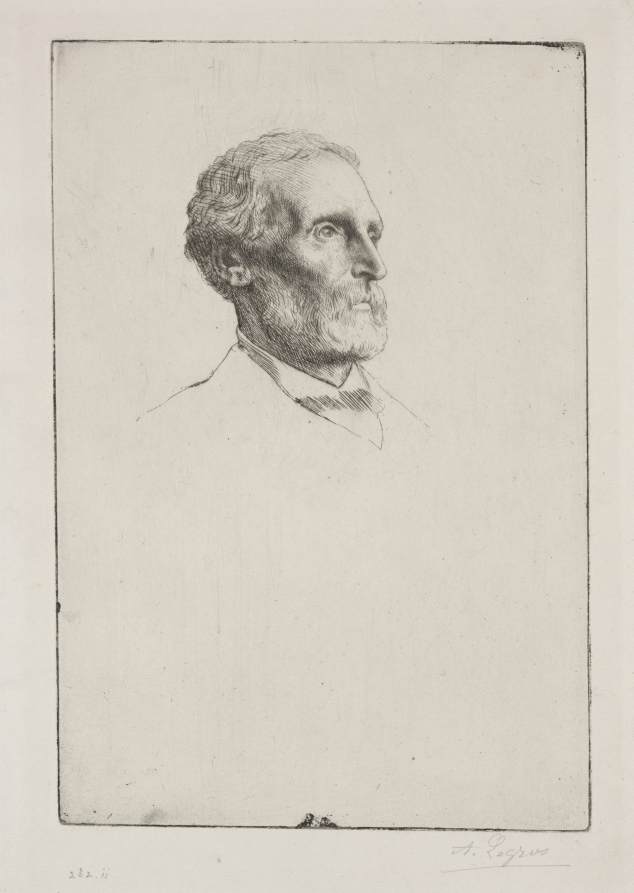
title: Sir Frederick W. Burton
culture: France, 19th century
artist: Alphonse Legros (French, 1837–1911)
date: c. 1857–1911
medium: etching and drypoint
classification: Print